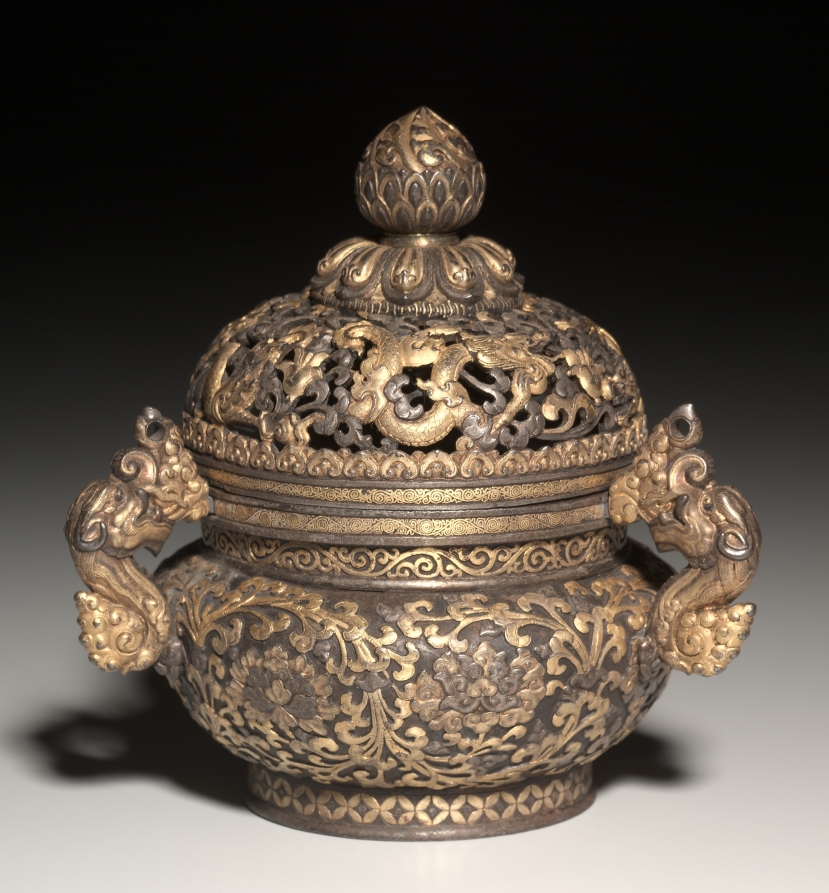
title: Incense Burner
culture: China, Yongle Period (1403-1424)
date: early 1400s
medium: iron inlaid with gold and silver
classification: Metalwork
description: This incense burner with gold and silver inlay has three dragon-head handles. Its main body is decorated with flowers placed in round fields formed by a winding creeper. The perforated cover is decorated with a dragon. The lotus bud on the top is used as a handle.